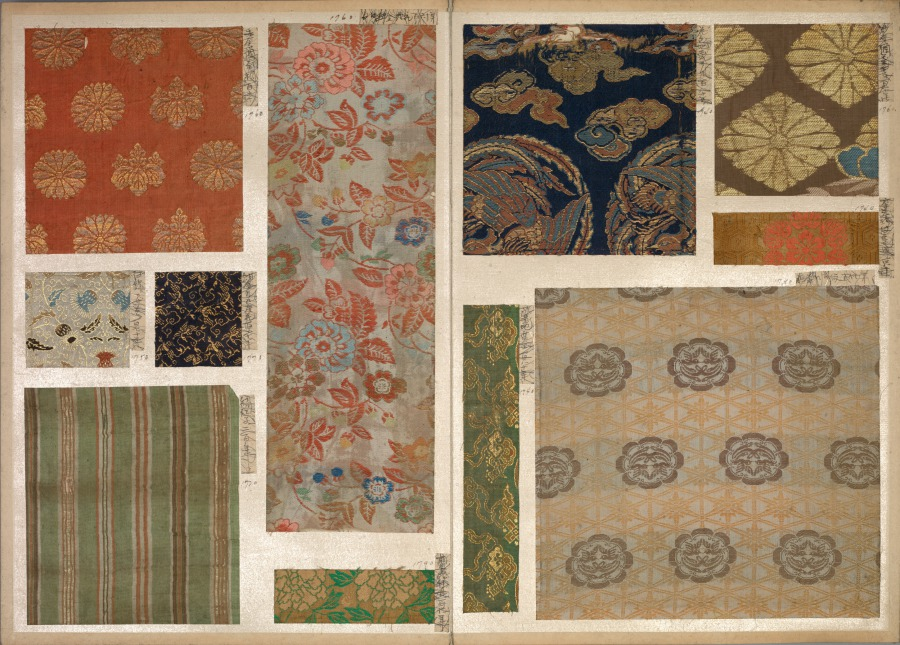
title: Album of Textile Samples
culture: Japan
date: 1790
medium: silk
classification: Textile